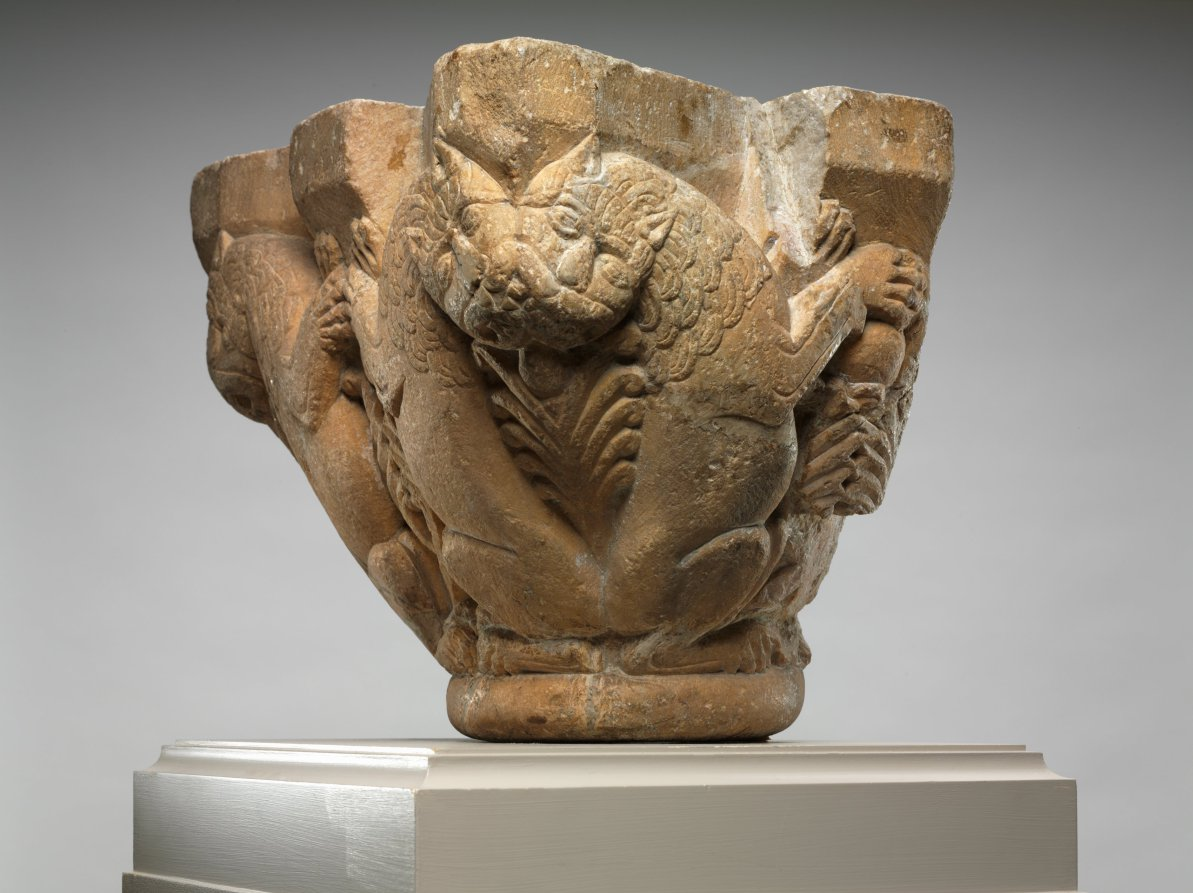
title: Engaged Capital with Lions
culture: Northern Spain (Navarre ?) or Southwest France (Pyrénées or Roussillon ?), mid-12th century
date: 1145–64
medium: marble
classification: Sculpture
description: The compositional motif of confronted and addorsed beasts illustrated on this capital was especially popular in churches along the pilgrimage roads.